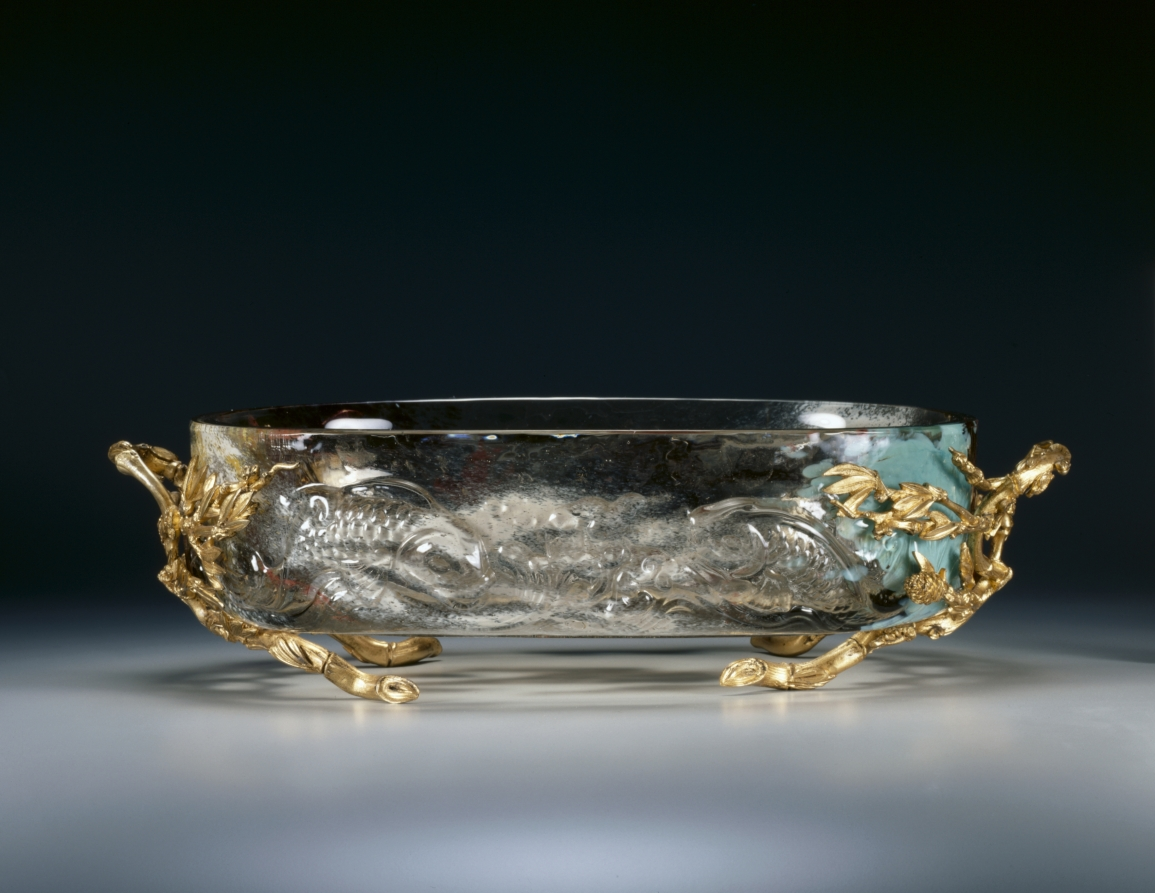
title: Centerpiece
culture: France, Paris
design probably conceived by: Eugène Rousseau (French, 1827–1891)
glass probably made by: firm of Appert Frères (French)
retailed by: firm of Escalier de Cristal (French)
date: c. 1880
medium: glass with gilt metal mounts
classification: Glass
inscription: on underside of glass: Escalier de Cristal. Paris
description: The retail firm of Escalier de Cristal seems not to have directly manufactured the wares they sold, but they exercised design control and sometimes brought together craftspeople of various talents and training to execute their stylish goods. Eugène Rousseau was not himself a craftsman, but he acted as a sort of editor, and glass and ceramics were made under his supervision. The glass of this bowl, with its cast relief decoration and colored inclusions, is of a kind associated with Rousseau. It is known that much of his glass was actually made by the firm of Appert Frères. In terms of style, this Centerpiece reflects the interest in things Japanese, which was an important element in the luxury goods made around 1880. The swimming fish and the naturalistic details of the gilt metal pinecones and twigs tied with string suggest this Asian source of inspiration.